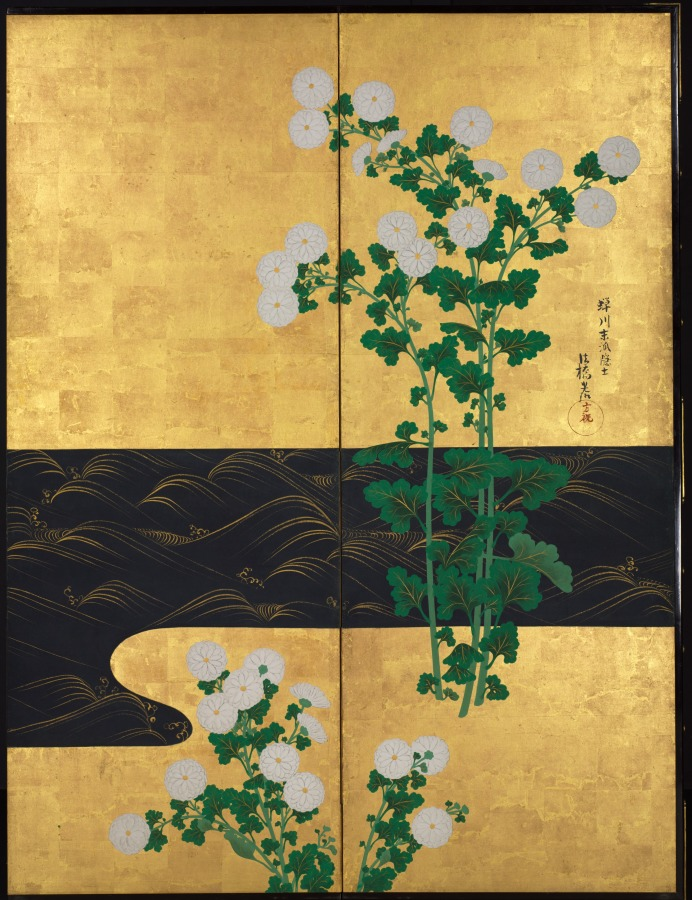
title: Chrysanthemums by a Stream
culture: Japan, Edo period (1615–1868)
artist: possibly by Ogata Kōrin (Japanese, 1658–1716)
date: c. 1715–30 or later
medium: One of a pair of six-panel folding screens; ink and color on gilded paper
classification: Painting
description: These screens recall a painting style so closely identified with Ogata Kōrin (1658–1716) that it is called Rinpa, or “Rin School,” after the ideograph “rin” in his name. The highly stylized background accentuates floral groupings that have been groomed so as to appear utterly artificial, like the synthetic arrangements available today. Kōrin's genius derived in large measure from natural phenomena painstakingly observed and then manipulated to create compositions of startling refinement and sparkling isolation. This process may have grown out of Kōrin's early immersion in the family textile business, a medium that encourages such dramatic distillations of form: the stream's gold-crested waves bring to mind traditional kimono robe designs of Kōrin's era. Works with the signature seen on this painting, including a style name, or persona suggested to Kōrin by his brother Kenzan (1663–1743), are sometimes considered to have been produced either in the last year of his life, when he was very ill, or after his death. In both scenarios, the lion’s share of the work would have been done by studio assistants, but little is truly known of his studio practice. Given the regularity of the gold waves on the stream, and the tension in the arrangement of the chrysanthemums, it is also possible that the screens were made in emulation of Kōrin's designs by a later artist.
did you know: The signature used on these screens may indicate paintings made in the last year of the artist's life, or works completed by his studio after his death.